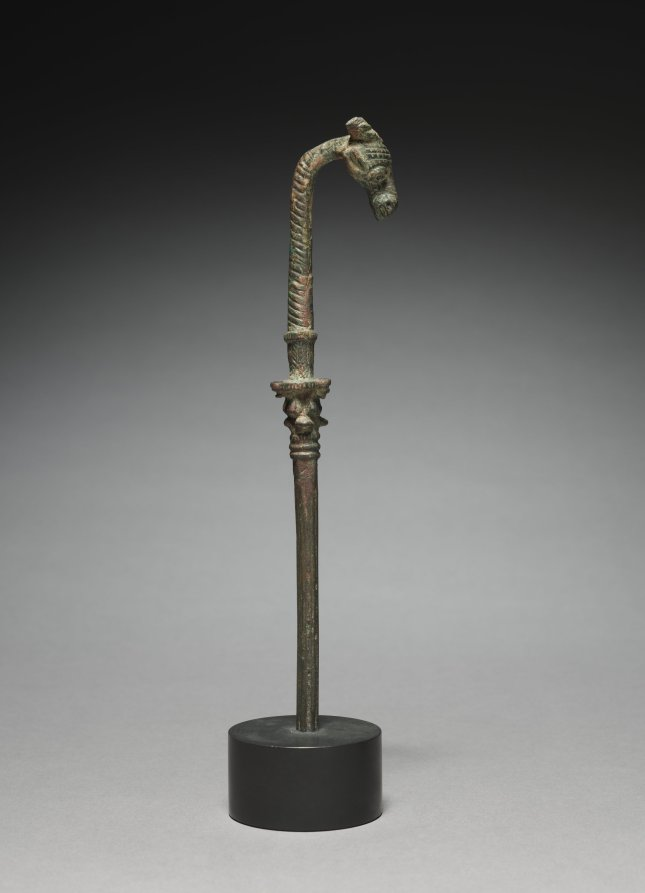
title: Votive Pin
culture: Iran, Luristan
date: early 1000s BCE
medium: bronze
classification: Metalwork